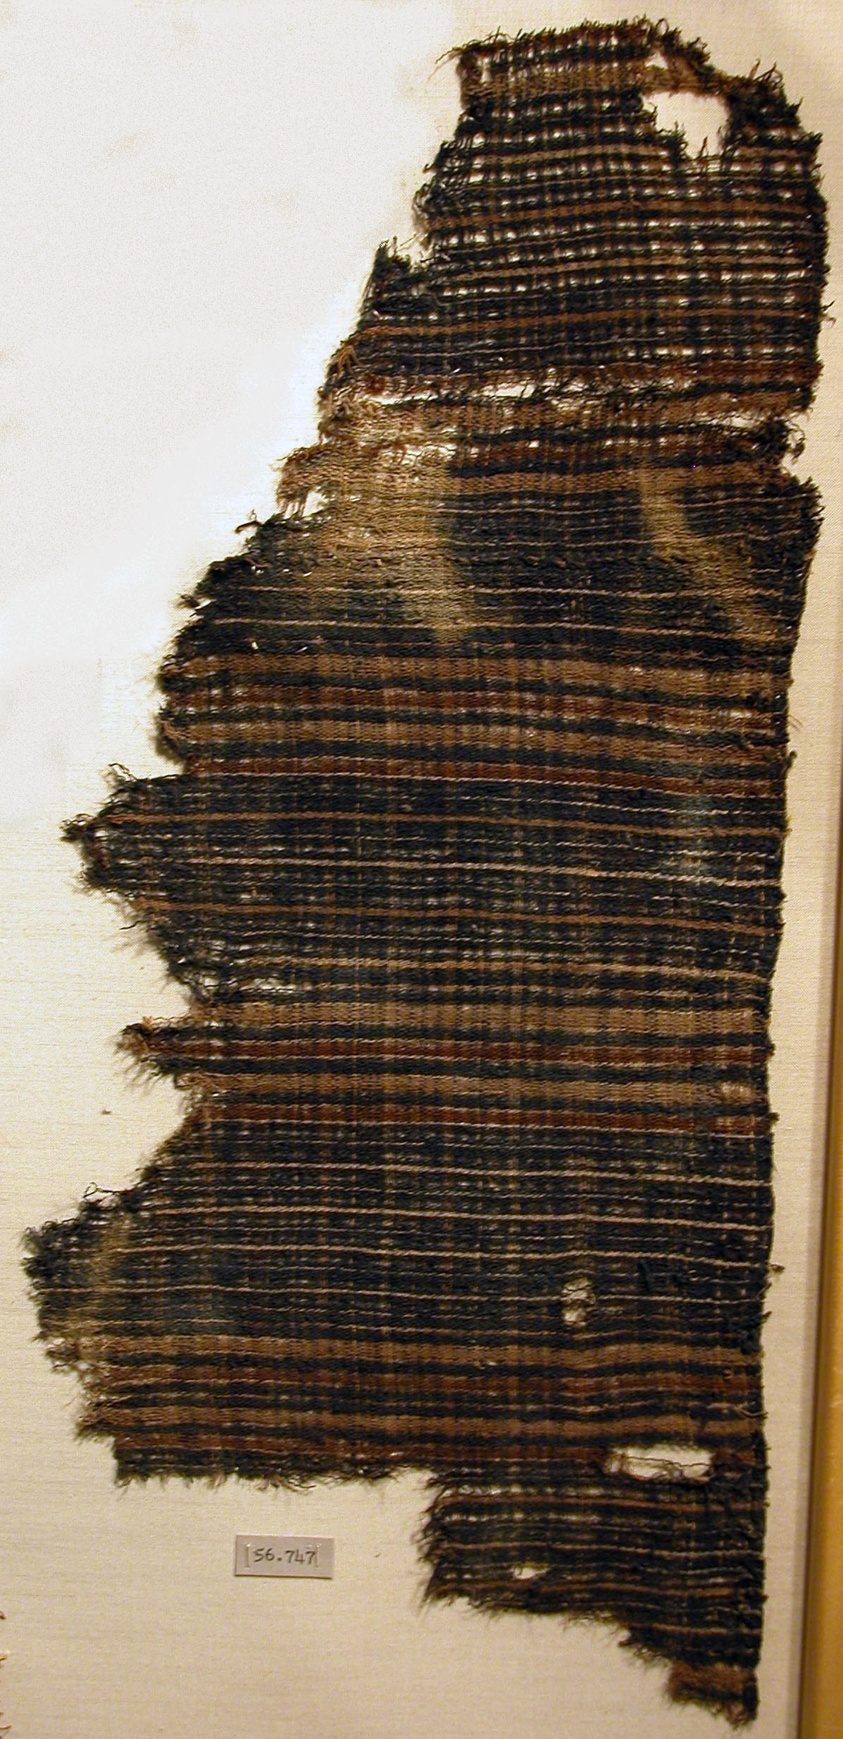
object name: Textile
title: Fragment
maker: Peru, north coast, Culebra Vallery, La Capilla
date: A.D. 1000/1476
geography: Peru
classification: textile; weaving